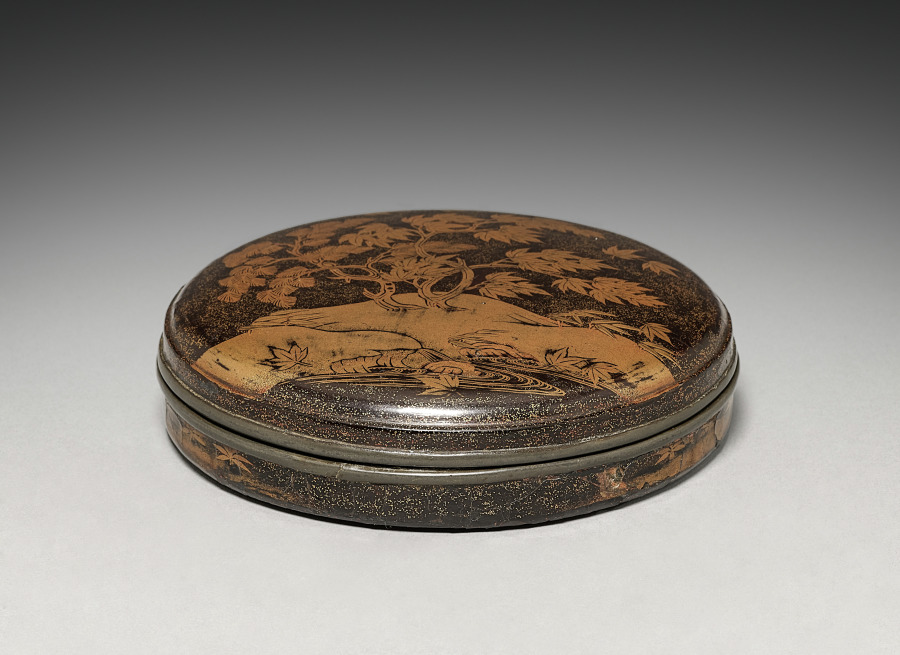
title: Mirror Container with Design of Maple Tree and Autumn Shower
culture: Japan, Muromachi period (1392–1573)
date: 1400s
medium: lacquer on wood with decoration in maki-e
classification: Lacquer